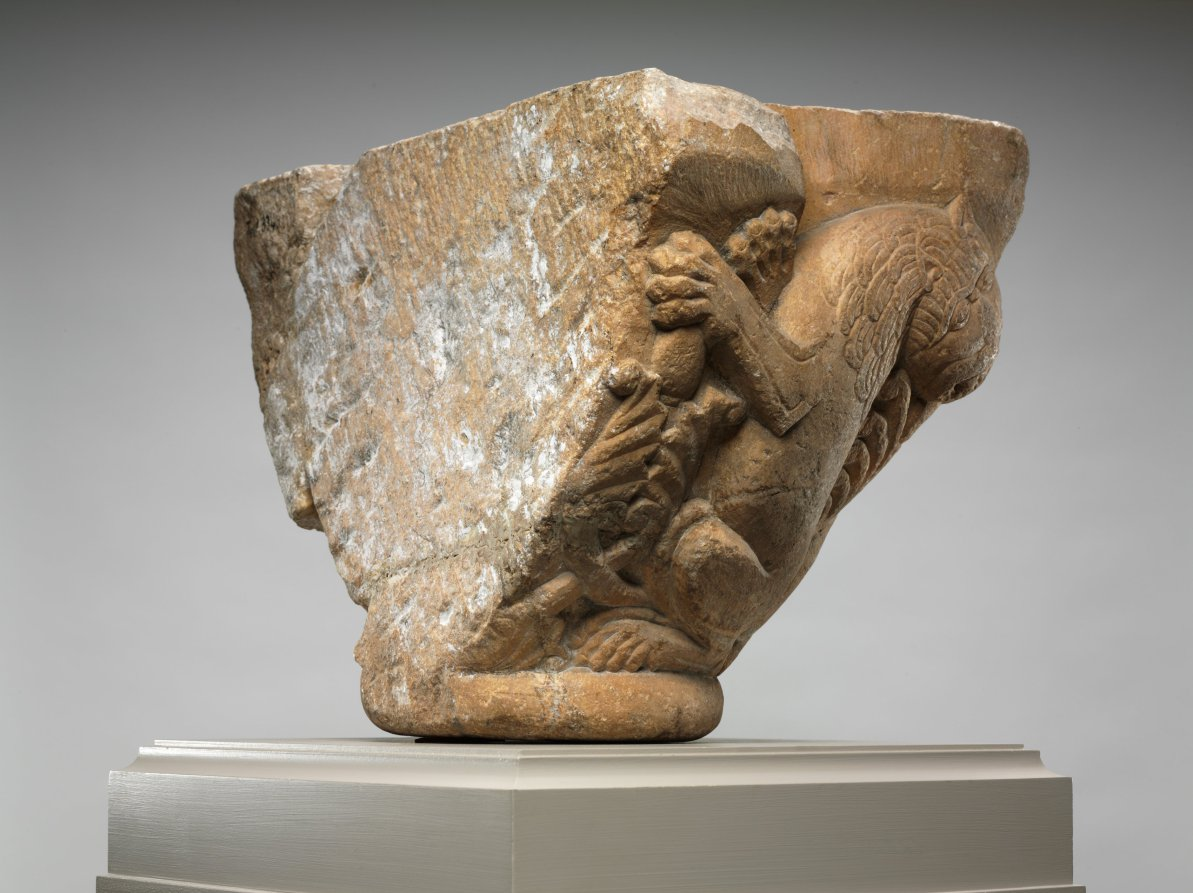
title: Engaged Capital with Lions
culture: Northern Spain (Navarre ?) or Southwest France (Pyrénées or Roussillon ?), mid-12th century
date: 1145–64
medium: marble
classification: Sculpture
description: The compositional motif of confronted and addorsed beasts illustrated on this capital was especially popular in churches along the pilgrimage roads.